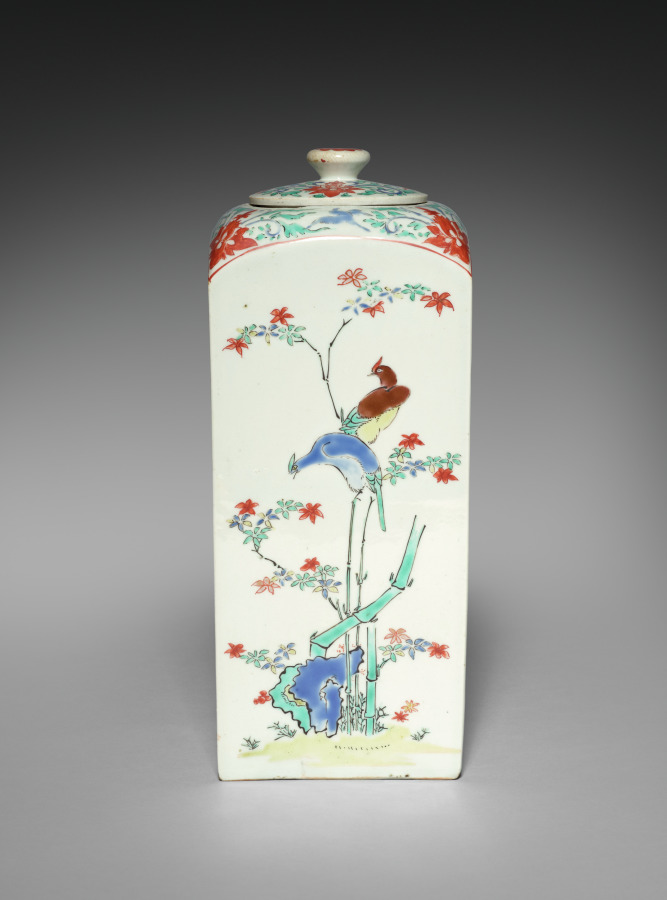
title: Square Jar with Birds and Flowers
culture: Japan, Edo period (1615–1868)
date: late 1600s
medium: Porcelain with overglaze color enamels and gold (Hizen ware, Kakiemon type)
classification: Ceramic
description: This lidded square jar was likely paired with a complementary yet nonidentical mate. The pine tree, plum, and bamboo together form the frequently depicted motif known as the Three Friends of Winter (shōchikubai), so named because of their hardy perseverance in the cold. Each side also features a pair of birds, including cranes on one face and pheasants on another.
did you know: A jar like this was fired at a high temperature, painted with colored enamels, and then fired again at a lower temperature.